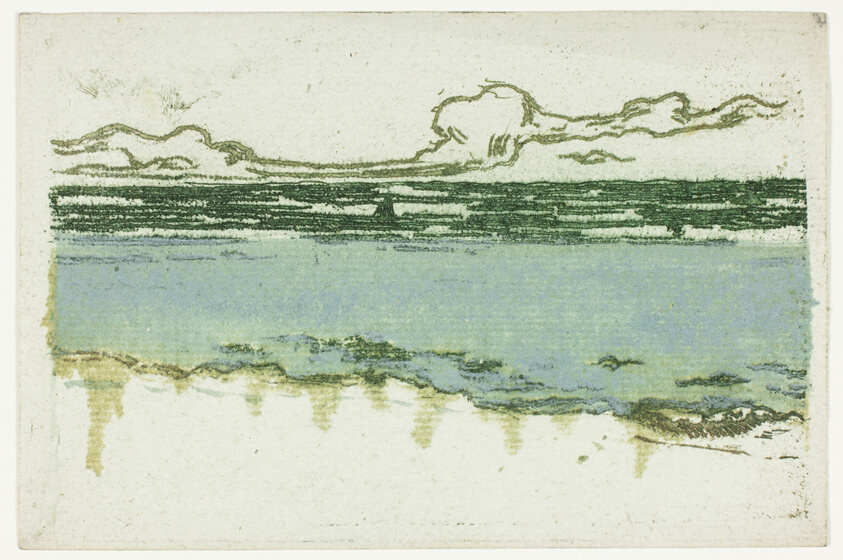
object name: Print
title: The Sea at Bognor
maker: Theodore Roussel (French, worked in England, 1847-1926)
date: 1895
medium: Soft ground etching, inked à la poupée, in yellowish green and greenish blue on ivory laid paper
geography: France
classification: etching; paper; print; prints and drawing